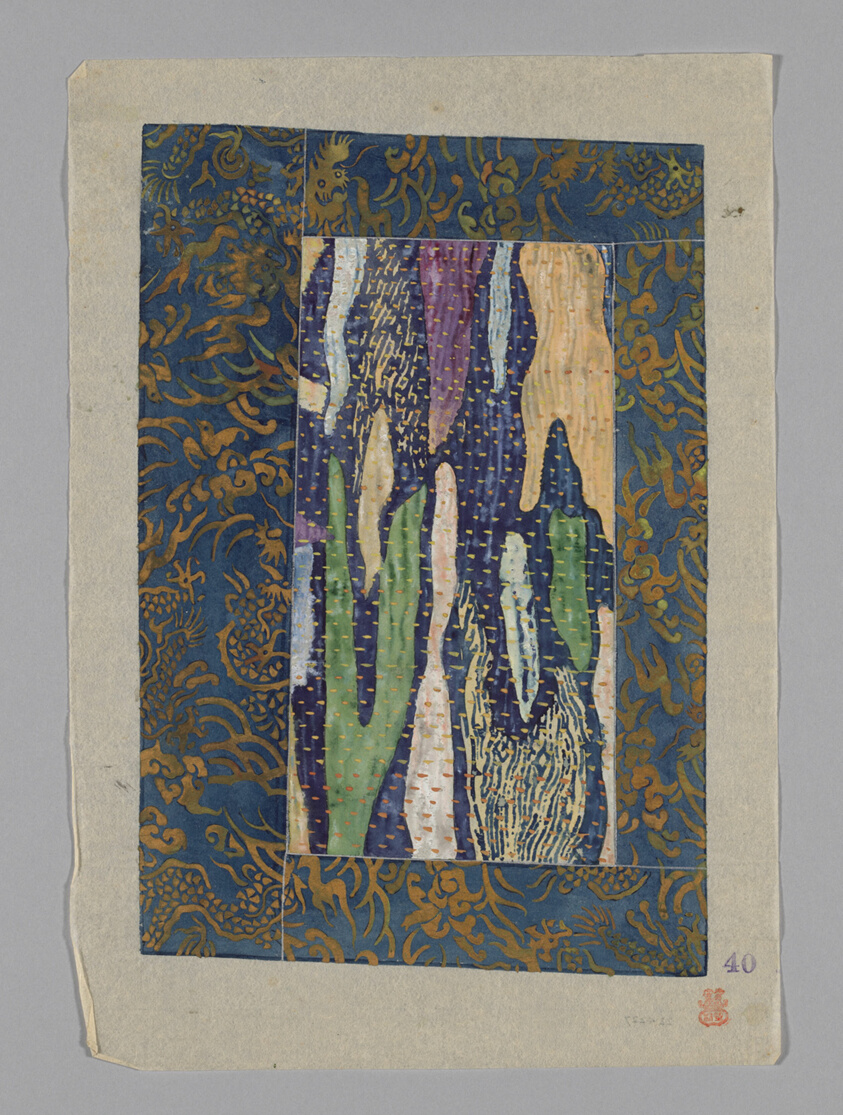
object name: Drawing and Watercolor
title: Design on Paper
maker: Japan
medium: Paper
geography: Japan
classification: textile; accessory - paper design; watercolor; paper